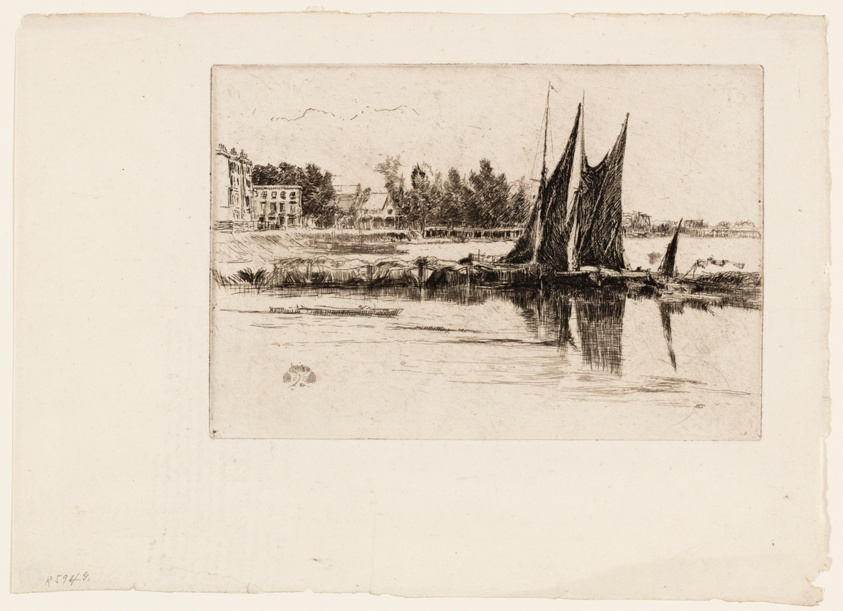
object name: Print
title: Hurlingham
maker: James McNeill Whistler (American, 1834-1903)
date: 1879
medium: Etching and drypoint with foul biting in black ink on off-white laid paper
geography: United States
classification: etching; foul biting; drypoint; print; prints and drawing; paper